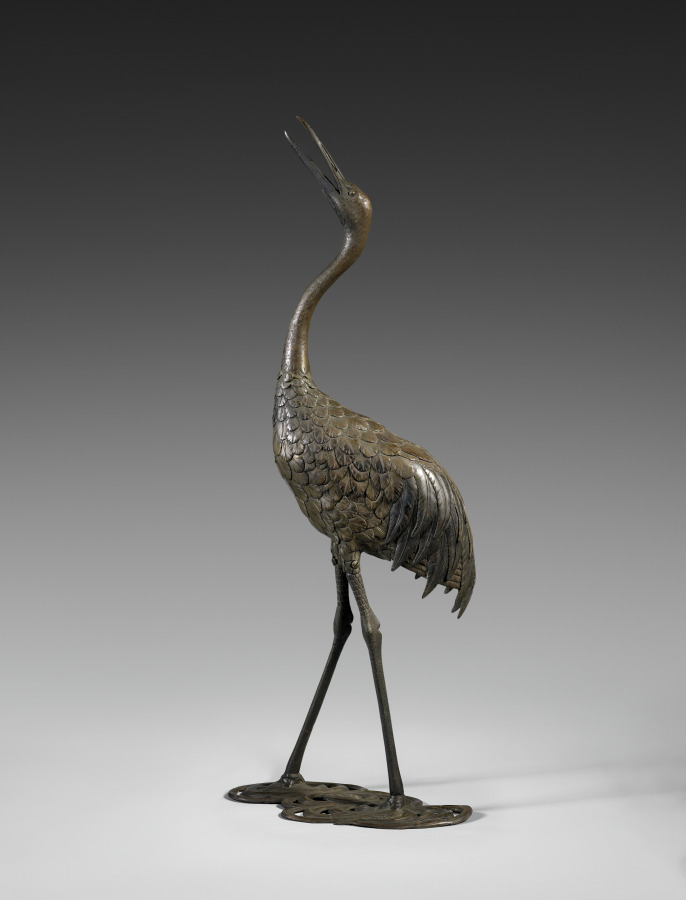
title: Crane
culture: Japan, Taishō period (1912–26) to Shōwa period (1926–89)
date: early to mid-1900s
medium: bronze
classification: Sculpture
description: This crane stands in water swirling around its feet, suggesting that it may have been intended for an interior setting without real water. Cranes symbolize longevity in East Asia, where they are said to live a thousand years. Representations of cranes are found across the centuries in cast metal form in Japanese religious settings. They are depicted as surface motifs on sacred objects, such as ritual mirrors, or as crane-shaped ornaments or incense burners. In the modern era, metal animals were made as sculptural works of art or as decorative objects for gardens.